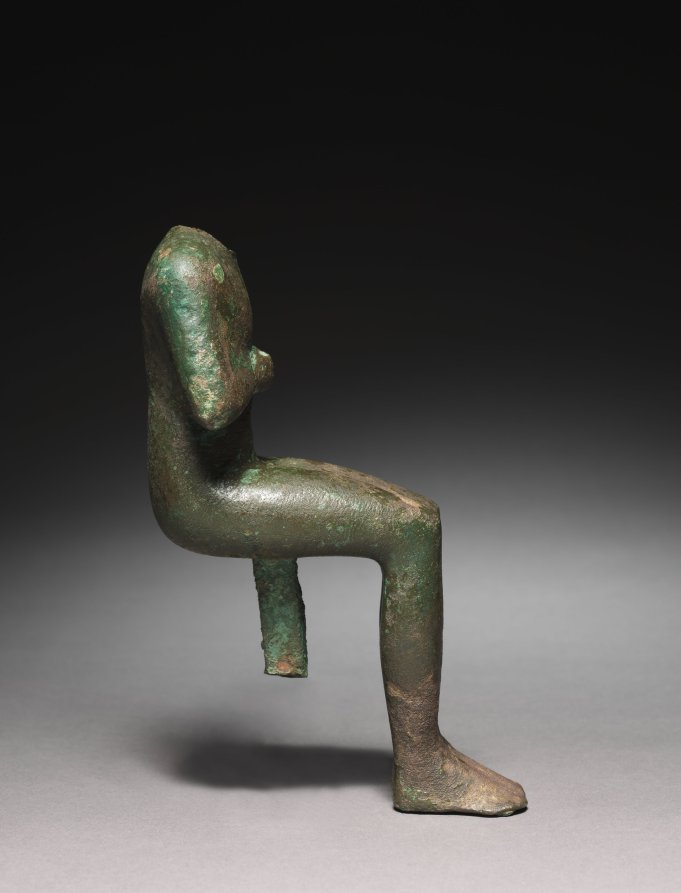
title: Statuette: Seated Mummiform Deity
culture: Egypt, Late period (715–332 BCE), Dynasty 26 or later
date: 664–525 BCE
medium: bronze, solid cast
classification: Sculpture